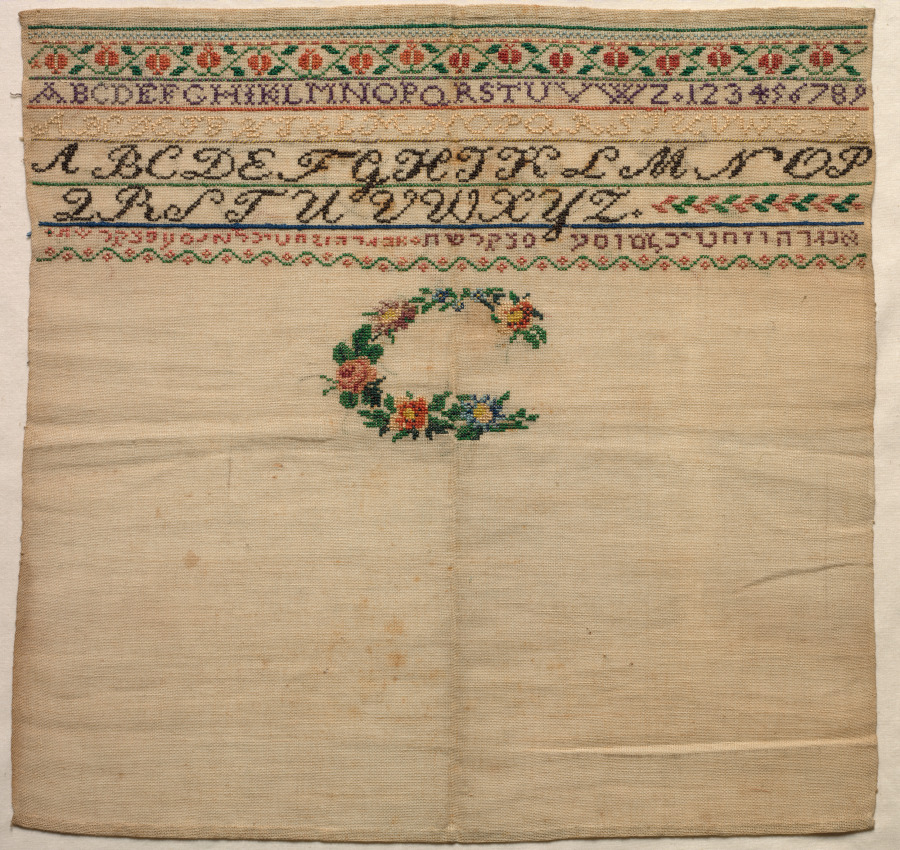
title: Sampler with Hebraic Inscription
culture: America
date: 19th-early 20th century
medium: embroidered linen or cotton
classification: Sampler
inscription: alphabets, numbers, and Hebrew inscription.